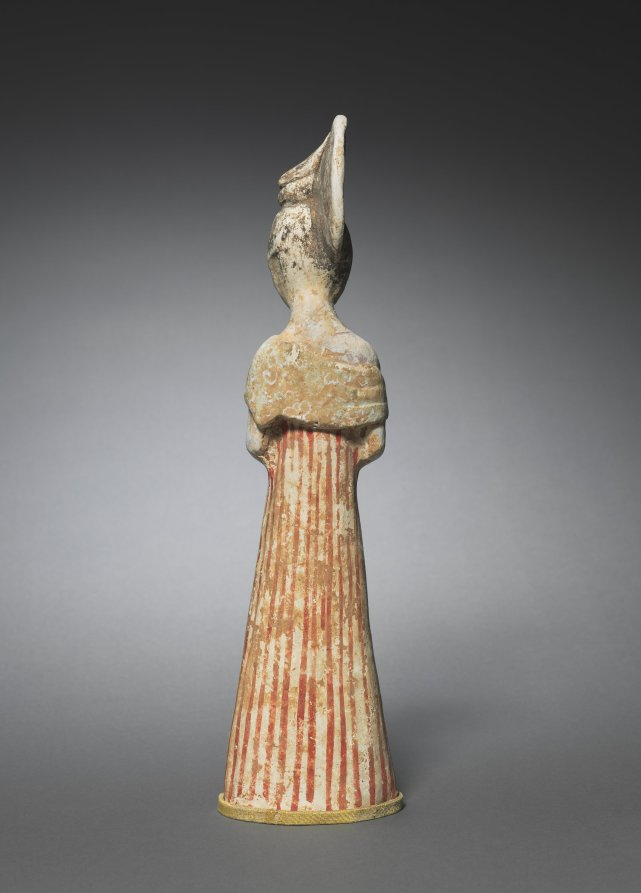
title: Court Lady with High Chignon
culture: North China, Tang dynasty (618-907)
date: c. 700–750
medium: earthenware with polychromy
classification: Sculpture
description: Tang figurines placed in the tombs give a vivid picture of everyday life. Images of elegant ladies in various hairstyles, costumes, and activities suggest the fashion of the time. This slender court woman's clasped hands are covered by long, narrow sleeves. Her v-neck blouse is tucked into a floor-length skirt with empire waistband. A long stole drawn from the bodice and across the back falls between her wrists. Her skirt is painted with thin red stripes, the waistband with double red circles, and the stole with white rosettes in unfired pigments. Her black hair is piled into high angled chignon. Together with other figurines—court officials, musicians, dancers, hunters, foreign travelers, horses, camels, guardian warriors, and guardian animals—such tomb sculptures accompanied the deceased in the afterlife.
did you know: Tang aristocratic women had a high degree of freedom, especially in contrast with the Neo-Confucianism of the later Song dynasty.